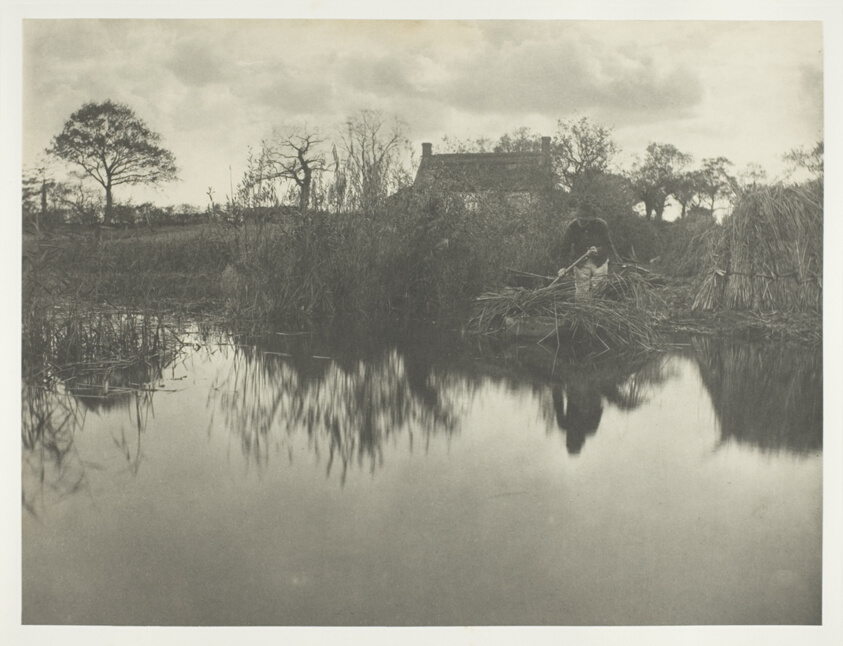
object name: Photograph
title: Quanting the Gladdon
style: 19th century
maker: Peter Henry Emerson (English, born Cuba, 1856–1936)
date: 1886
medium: Platinum print, pl. XXXIV from the album "Life and Landscape on the Norfolk Broads" (1886)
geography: England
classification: platinum print; photographic process; photography; photograph